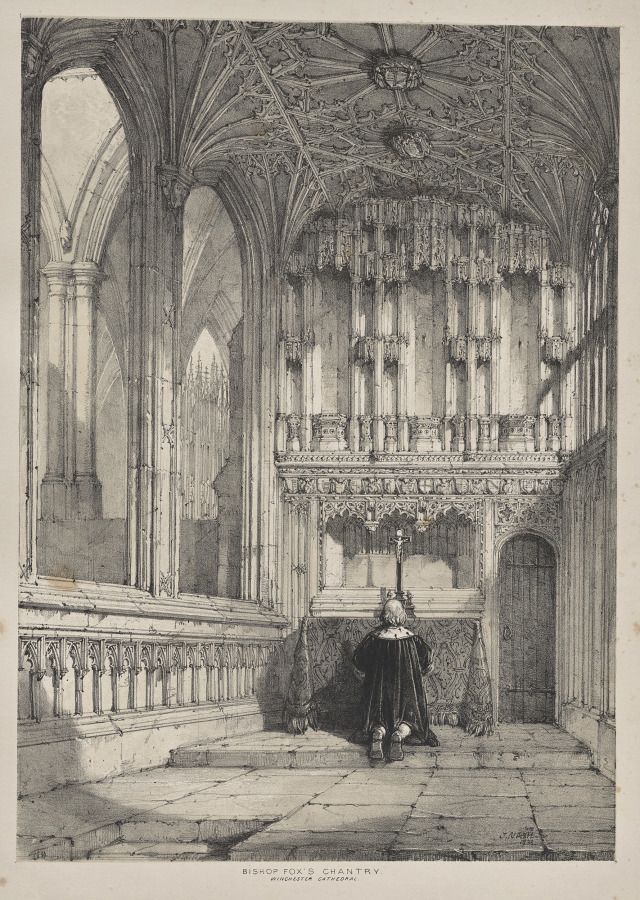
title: Architecture of the Middle Ages: Bishop Fox's Chantry, Winchester Cathedral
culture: England, 19th century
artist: Joseph Nash (British, 1808–1878)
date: 1838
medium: lithograph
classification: Print